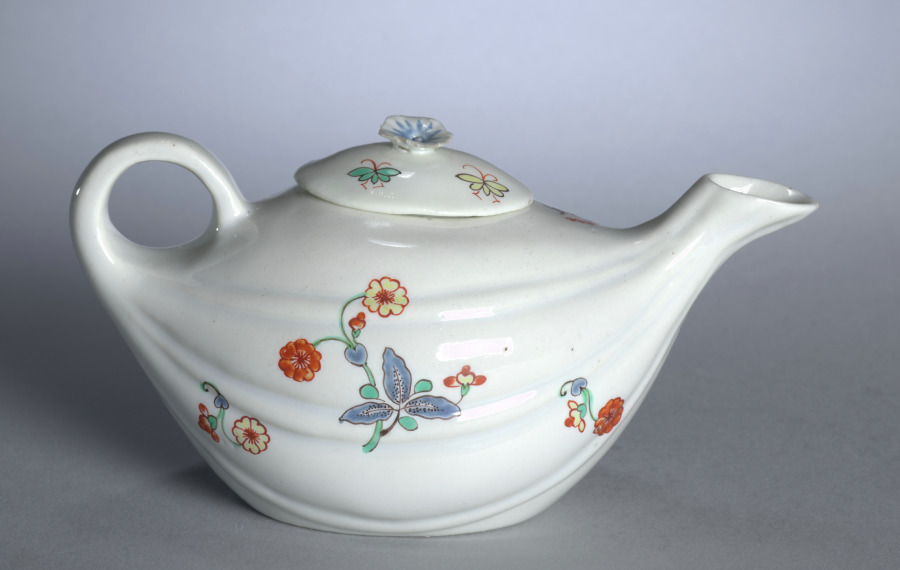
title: Teapot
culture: France, Chantilly, 18th century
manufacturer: Chantilly Porcelain Factory (French)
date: c. 1730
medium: soft-paste porcelain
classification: Ceramic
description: The pieces composing this individual tea set are entirely typical of Chantilly soft-paste porcelain in the Kakiemon style. Both the form and decoration of these pieces were inspired by Japanese prototypes. The use of knobs in the form of trumpet-shaped blossoms is characteristic of Chantilly wares.